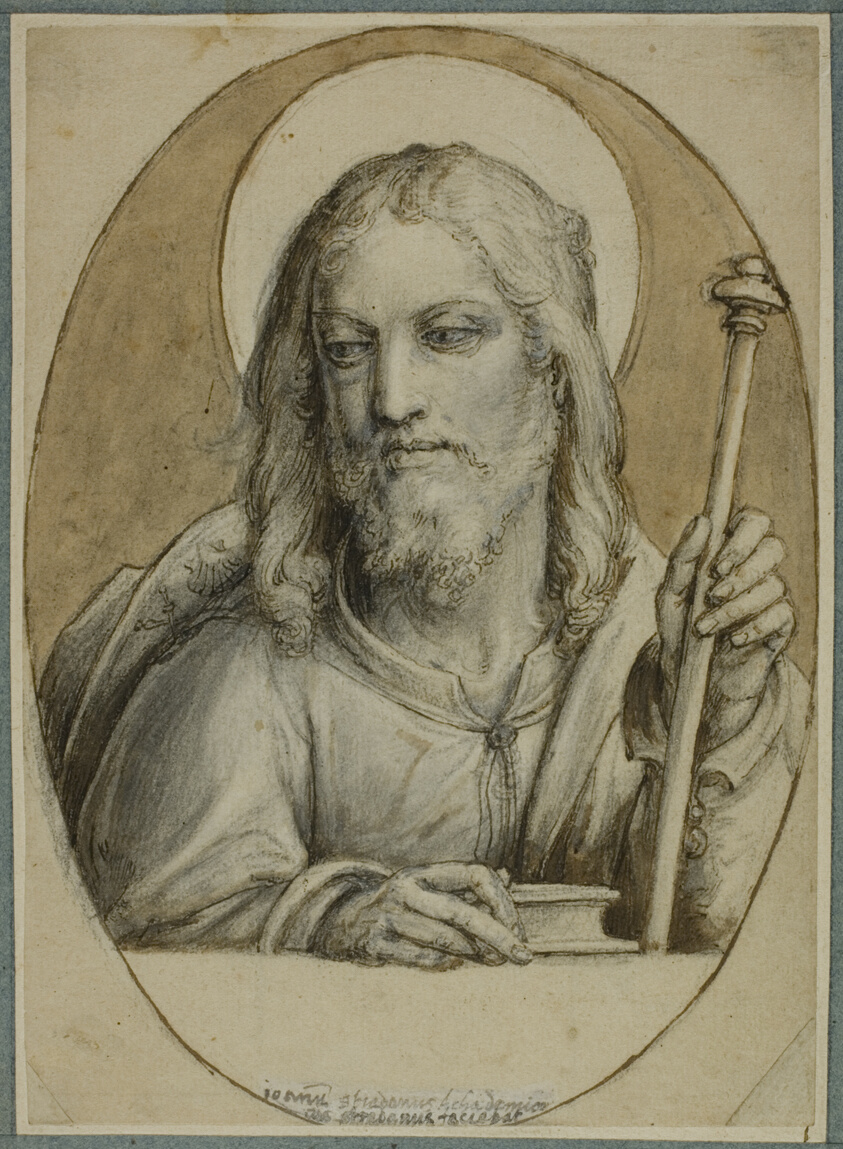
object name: Drawing and Watercolor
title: Saint James the Great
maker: Joannes Stradanus, called Giovanni Stradano; Flemish, 1523-1605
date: 1590/1605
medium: Pen and brown ink and brush and brown wash, with opaque white watercolor, over black chalk, on cream laid paper, incised for transfer and laid down on buff laid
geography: Flanders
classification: ink with wash; drawings (visual works); prints and drawing